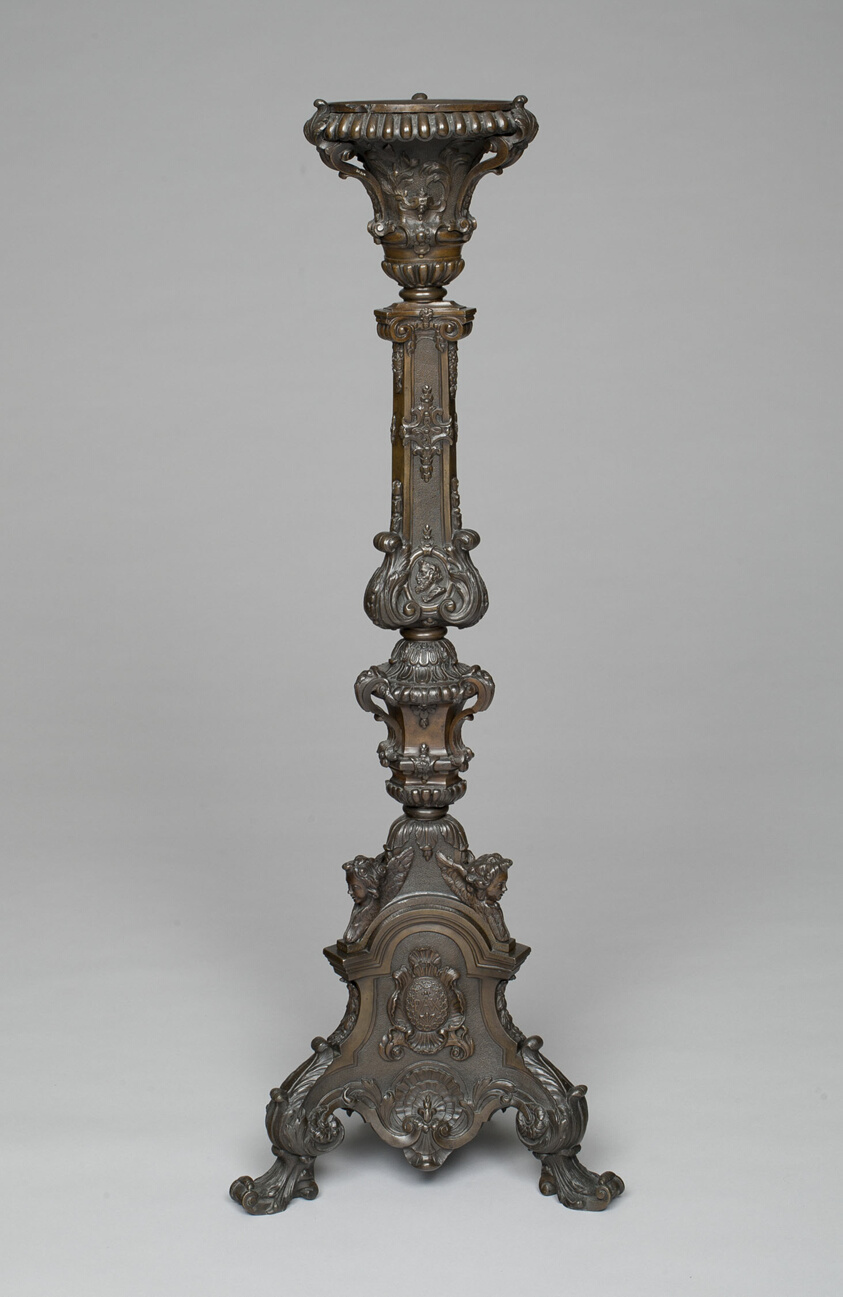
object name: Metalwork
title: Pascal Candlestick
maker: Paris, France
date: 1731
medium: Bronze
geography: Paris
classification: candleholder - candlestick; candleholder; bronze; metalwork; european decorative arts